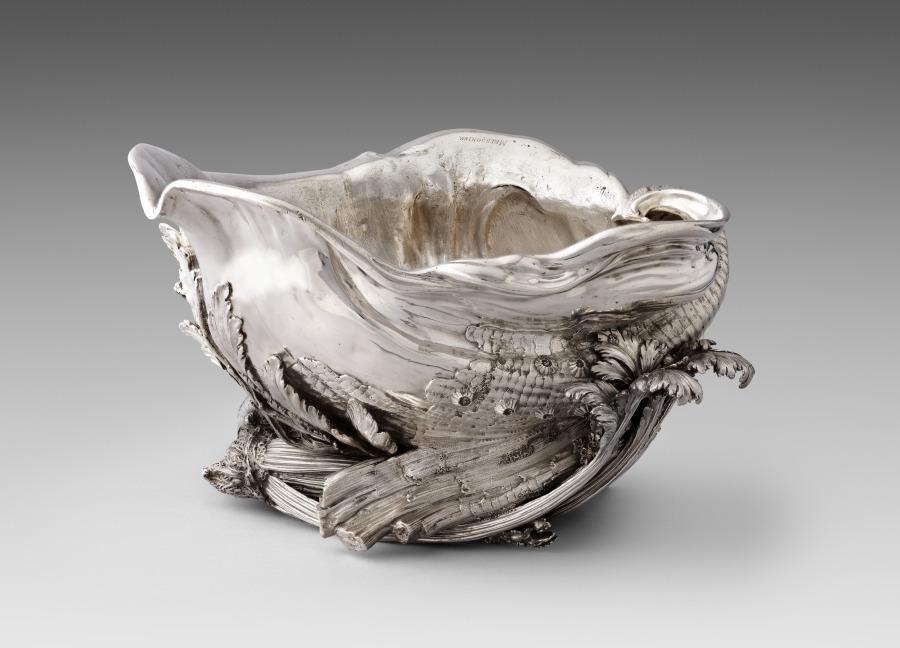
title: Tureen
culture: France, Paris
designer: Juste-Aurèle Meissonnier (French, 1695–1750)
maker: Pierre-François Bonnestrenne (French)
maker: Henry Adnet (French, 1745)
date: 1735–38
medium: silver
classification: Silver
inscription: engraved Meissonnier signature.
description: See entry for cover record 1977.182.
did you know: The langoustine, pigeon, and vegetables were cast using real examples giving the silver copies lifelike detail and appearance.